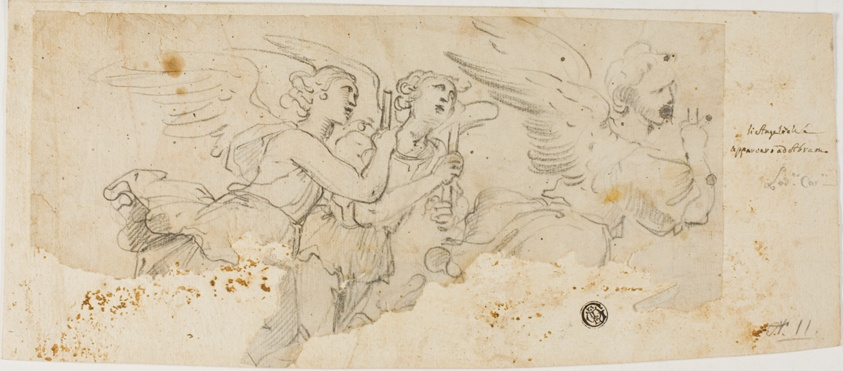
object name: Drawing and Watercolor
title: Angels Appearing to Abraham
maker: Possibly after Lodovico Carracci (Italian, 1555-1619); or possibly Style of Giuseppe Cesari (Italian, 1568-1640); or possibly Giovanni Battista Carlone (Italian, 1592-1677); or possibly Domenico Fiasella (Italian, 1589-1669)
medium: Black chalk on ivory laid paper, laid down on cream laid paper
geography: Italy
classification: charcoal; drawings (visual works); prints and drawing